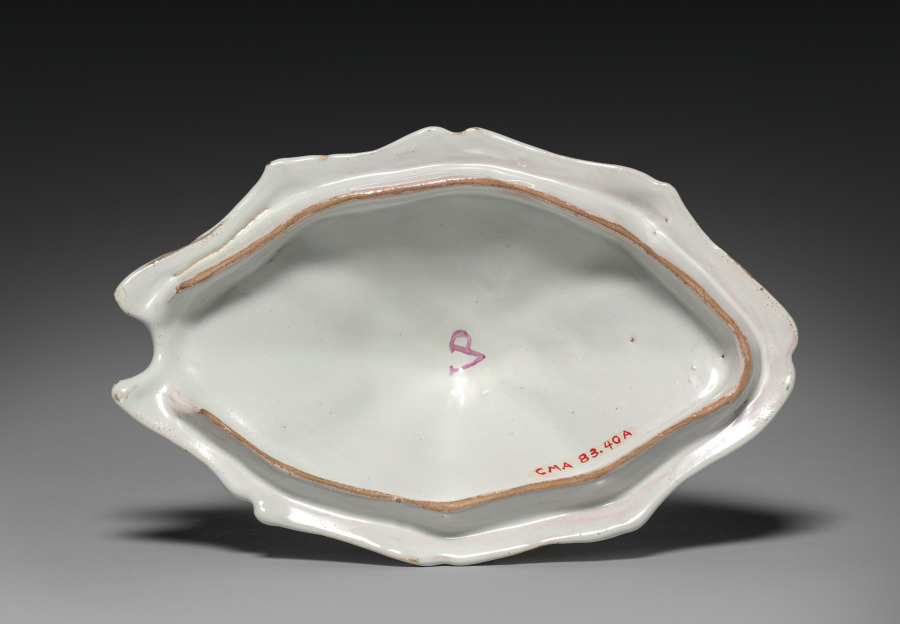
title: Cover for a Sauce Tureen with Attached Stand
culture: France, Marseilles, 18th century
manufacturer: Veuve Perrin Factory (French)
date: c. 1765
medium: tin-glazed earthenware (faience) with enamel decoration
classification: Ceramic